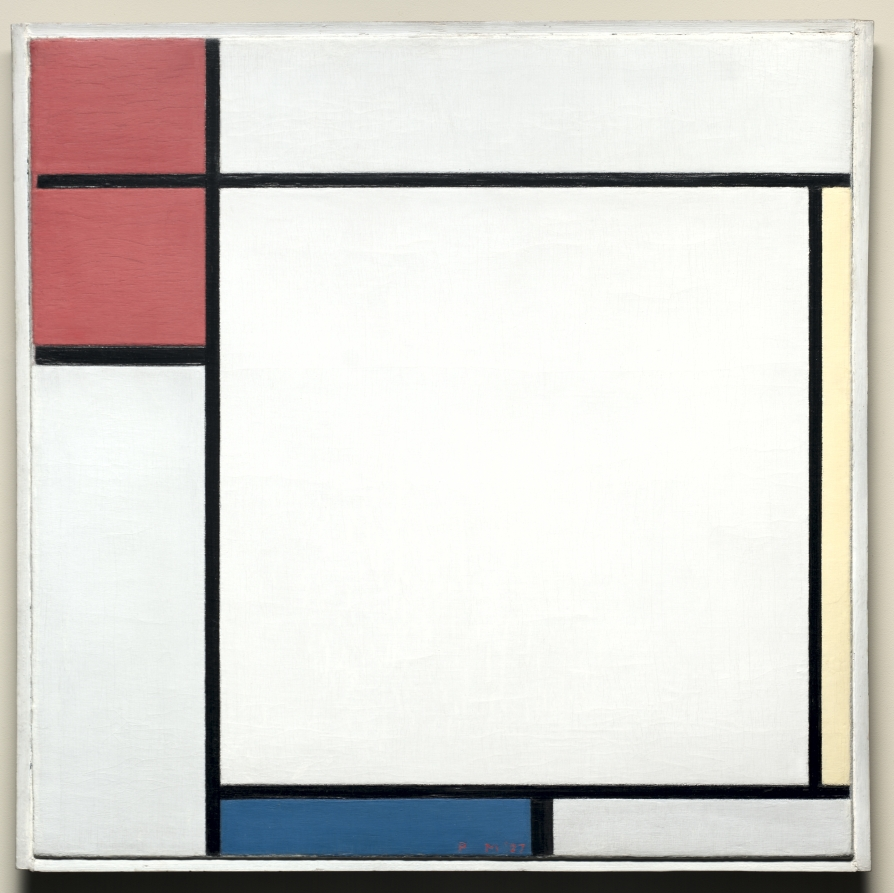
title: Composition with Red, Yellow, and Blue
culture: Netherlands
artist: Piet Mondrian (Dutch, 1872–1944)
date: 1927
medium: oil on canvas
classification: Painting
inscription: signed lower center: P M '27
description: During the 1910s, Piet Mondrian’s art progressed from Cubism to an increasingly abstract style based on the form of a grid. He completely abandoned the representation of natural appearances, limiting himself to horizontal and vertical rectangles and three primary colors (red, yellow, and blue) along with black and white. Intensely intellectual and deeply philosophical, Mondrian believed that following the devastation of World War I, such abstract compositions could contribute to a more harmonious society by communicating in a universal, visual language.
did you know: The small strip of wood around the outside of the canvas, painted the same gray as the canvas surface, is Mondrian’s original frame for the painting.